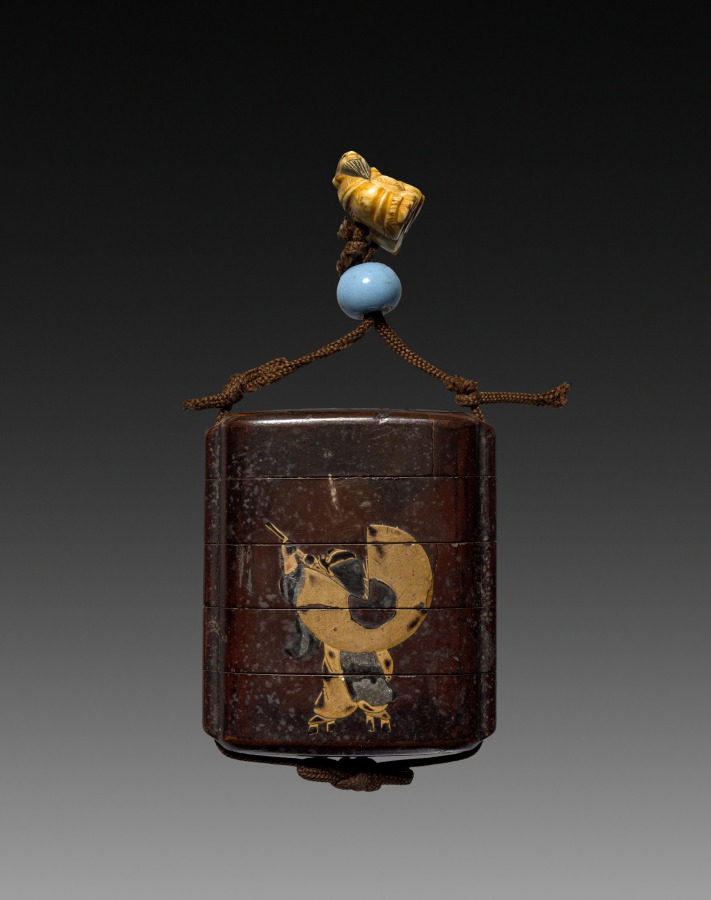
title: Inro with Shrine Gate and Figure Shooting Bird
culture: Japan, Edo period (1615–1868) to Meiji period (1868–1912)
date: mid-1800s to early 1900s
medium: lacquered wood, ivory, blue bead, gold leaf, pigment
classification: Lacquer